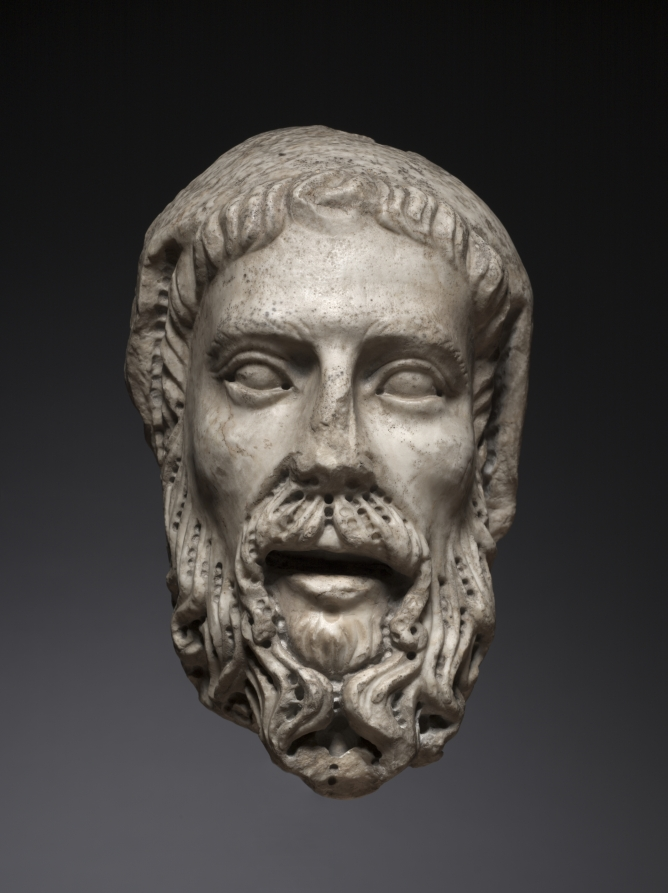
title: Head of a Prophet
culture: Italy, Siena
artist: workshop of Giovanni Pisano (Italian, c. 1240-c. 1320)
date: c. 1300–1325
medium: marble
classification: Sculpture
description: This head exhibits many of the characteristics of the style associated with the workshop of Giovanni Pisano. These are particularly noteworthy in the sensitive carving of the haunting face and its strikingly drilled beard. The head compares favorably to the sculpture made while Giovanni was master of works at Siena Cathedral (1285-97). Recent research suggests that it may once have belonged to a full-length Old Testament prophet looming on the exterior of Siena Cathedral.